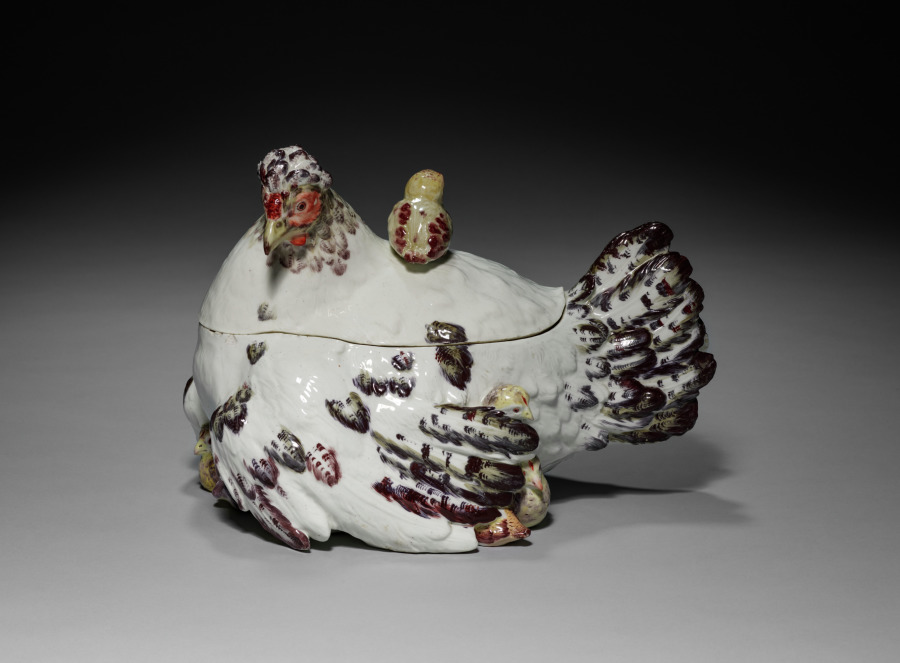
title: Hen and Chicks Covered Tureen on Stand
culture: England, London, Chelsea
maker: Chelsea Porcelain Factory (Britain, London, 1745–84)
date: c. 1755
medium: soft-paste porcelain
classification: Ceramic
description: The ceramic factory at Chelsea, located along the river Thames in western London, was Britain’s most renowned factory of decorative porcelain in the mid-1700s. Large tureens in the form of chickens or rabbits appealed to wealthy aristocrats, who took great care in developing specimen animal and poultry breeds on their country estates. The design for this particular tureen was taken from a popular seventeenth-century print by Francis Barlow depicting a farmyard.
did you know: Though the form of a soup tureen suggests a functional role at the dining table, such large, expensive porcelains were probably only used for decoration because hot liquids might have easily caused them to crack.